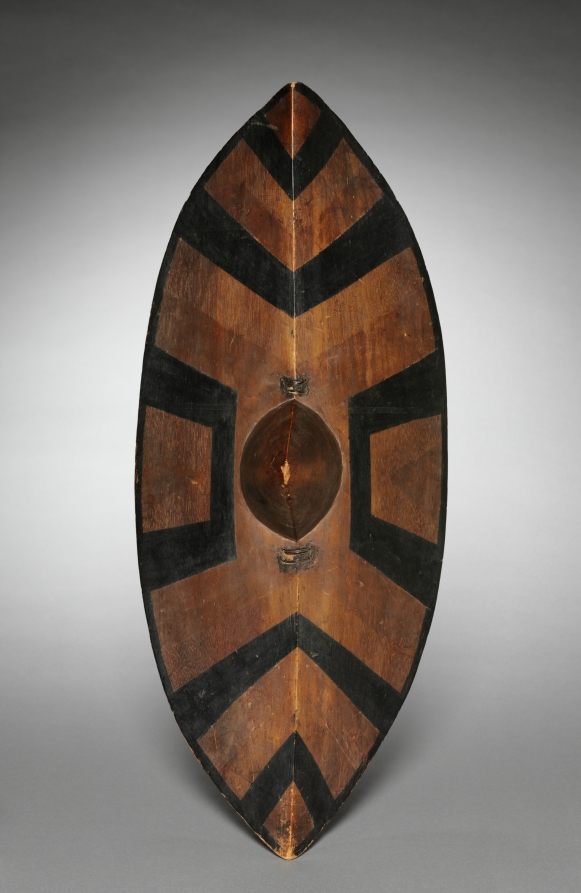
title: Shield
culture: Eastern Africa?, Uganda (?), early 20th century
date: early 1900s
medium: Wood, paint, and cord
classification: Arms and Armor